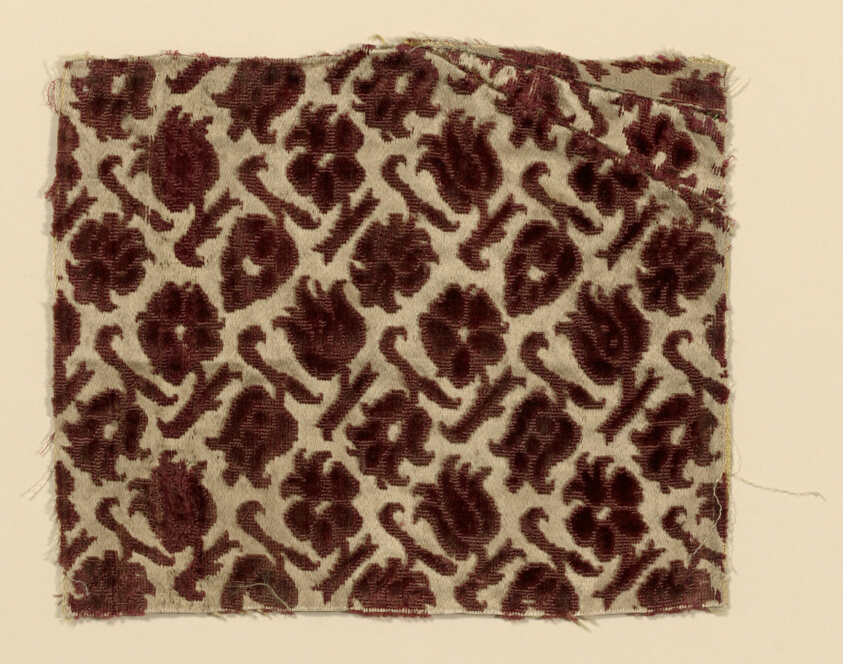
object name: Textile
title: Fragment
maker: Italy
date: 1600/25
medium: cisele voided satin velvet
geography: Italy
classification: textile; weaving - velvet